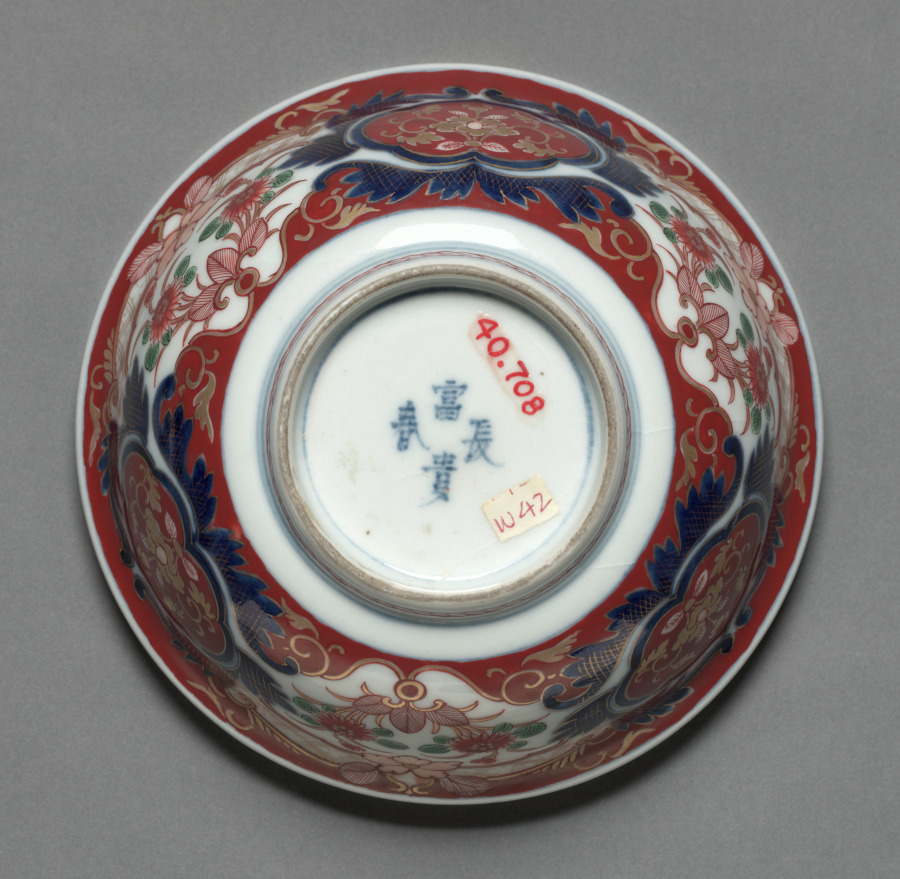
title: Covered Bowl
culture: Japan, Edo period (1615–1868)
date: early to mid-1800s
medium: white porcelain with underglaze blue, overglaze enamel, and gold decoration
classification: Ceramic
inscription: four characters in blue circle on base, translate as: "Wealth Long Spring."